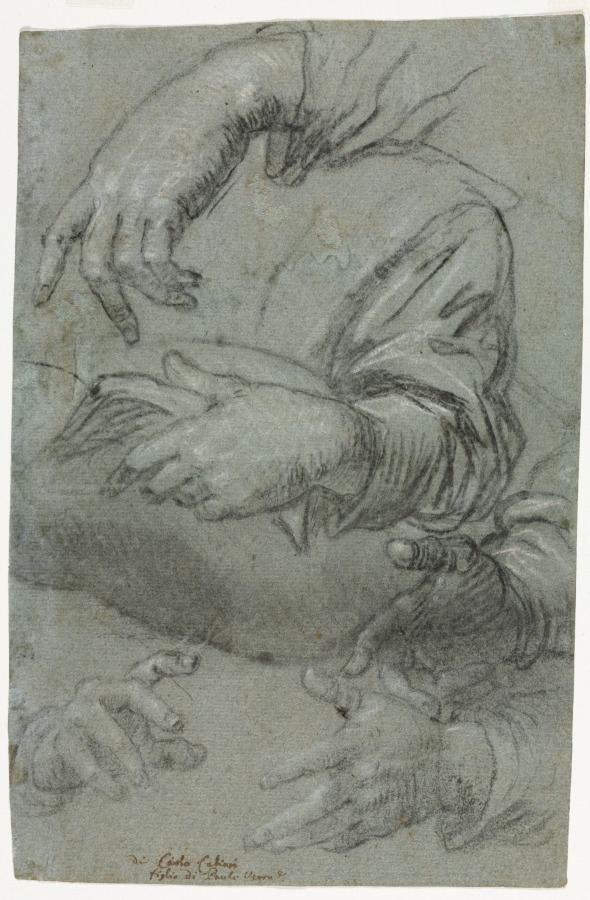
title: Studies of Hands (recto); Sketch of a Child's Head (verso)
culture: Italy, 16th century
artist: Carletto Caliari (Italian, 1570–1596)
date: c. 1586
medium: charcoal (stumped in places) heightened with white chalk; black chalk with pen and brown ink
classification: Drawing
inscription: (r) lower center, in brown ink: di Carlo Caliari / figlio di Paulo Verone. v) in brown ink “Amor di meritrice. Carletto Calliari è matto”, “Aabcdeg”, “Amor di meritrice” and in another hand, in brown ink, “Aqueta 163”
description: The talented second-born son of Italian Renaissance painter Paolo Veronese, Carletto Caliari assisted his father in the final years of the celebrated artist’s life. Successful Venetian painting studios were run as workshops, with staffs of trained apprentices working under a master’s supervision to simultaneously execute a multitude of commissions. Drawings such as this study of expressive hand gestures were used as reference materials to ensure stylistic consistency within the shop.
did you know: The inscription that identifies the artist in brown ink on this drawing is not a signature but rather an identification of the artist by a later hand, perhaps an owner of the drawing.